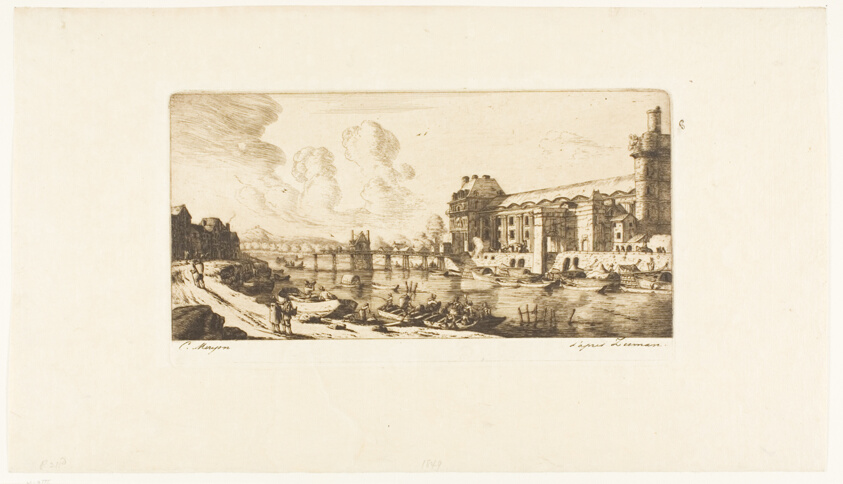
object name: Print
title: The 'Pavillon de Mademoiselle' and Part of the Louvre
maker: Charles Meryon (French, 1821-1868); after Reinier Nooms (Dutch, c. 1623-c. 1664)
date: 1849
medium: Etching, drypoint and roulette on buff laid Japanese paper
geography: France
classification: etching; print; prints and drawing